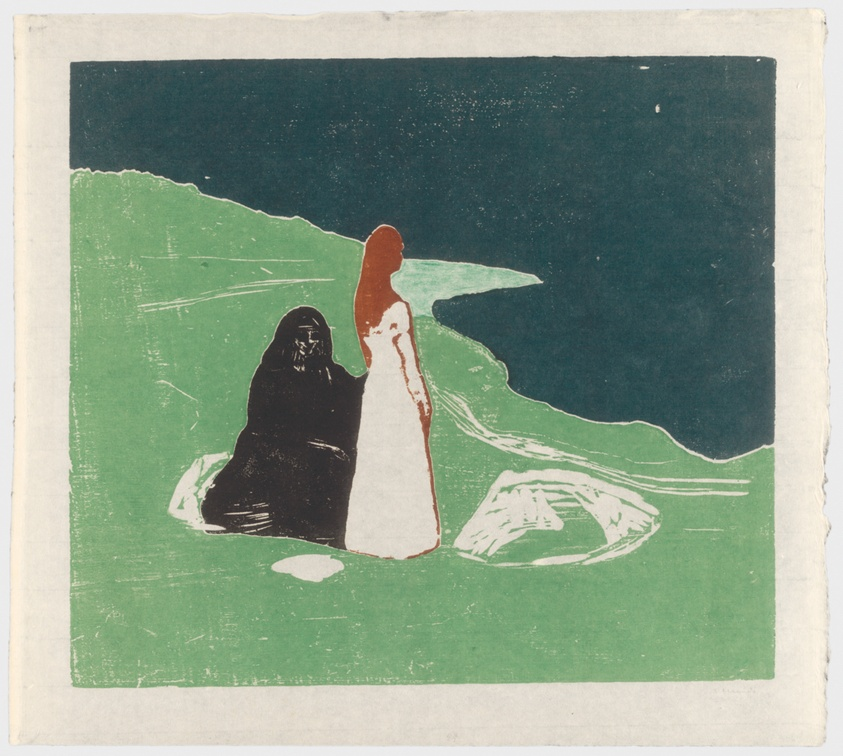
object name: Print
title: Two Women on the Shore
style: Post-Impressionism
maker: Edvard Munch (Norwegian, 1863-1944)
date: 1898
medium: Woodcut printed from one block (sawn into three sections) in dark blue, green, black and red-brown ink with additions in green crayon on cream Japanese paper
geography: Norway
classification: woodcut; print; prints and drawing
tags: women, landscapes, water